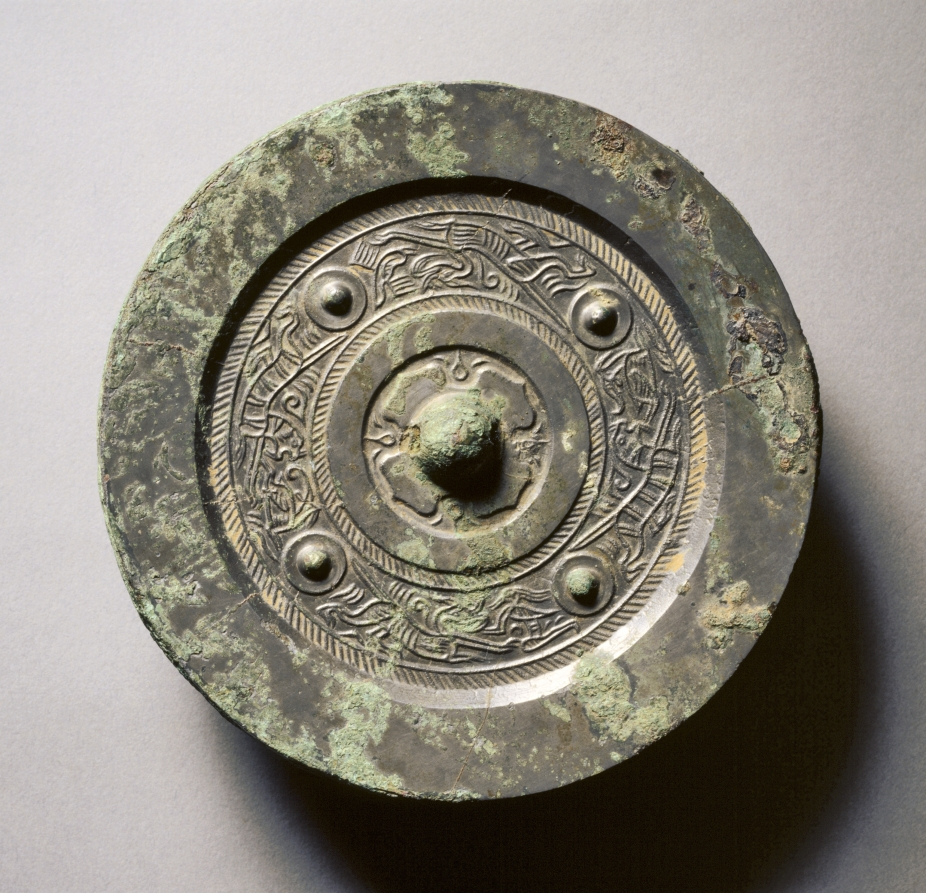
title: Mirror with Four Nipples, Dragons, and Tigers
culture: China, Western Han dynasty (206 BCE–8 CE)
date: 100–1 BCE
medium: bronze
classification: Metalwork